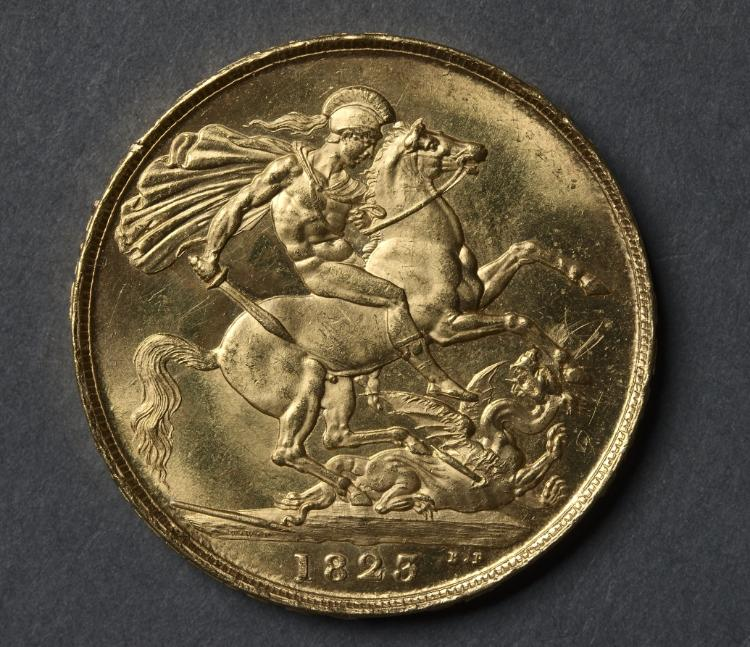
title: Two Pound Piece: St. George and the Dragon (reverse)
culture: England, George IV, 1820-1830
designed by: Benedetto Pistrucci (Italian, 1784–1855)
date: 1823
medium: gold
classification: Coins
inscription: below: 1895.